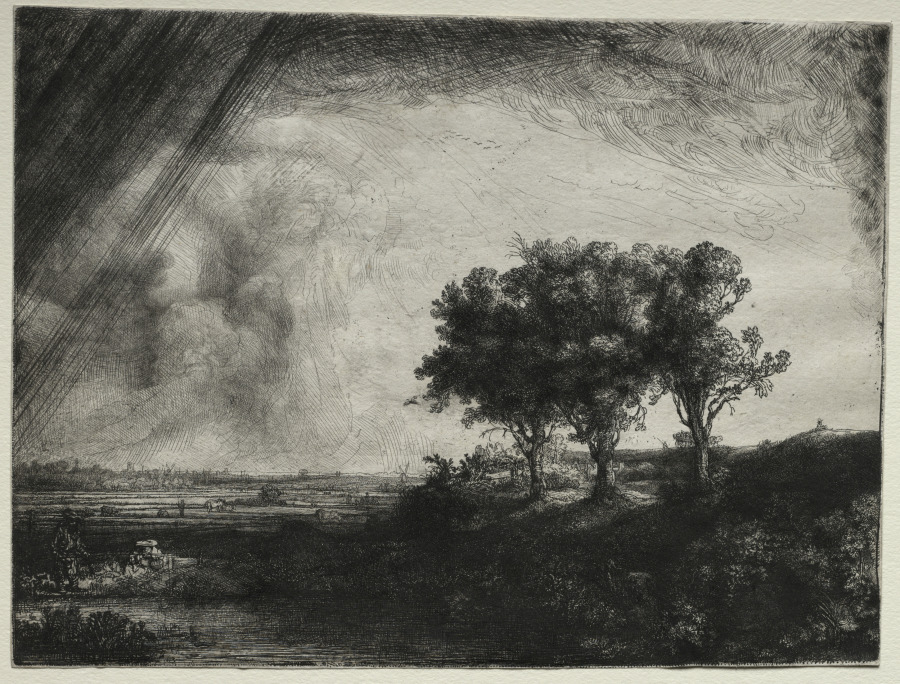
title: The Three Trees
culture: Netherlands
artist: Rembrandt van Rijn (Dutch, 1606–1669)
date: 1643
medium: etching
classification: Print